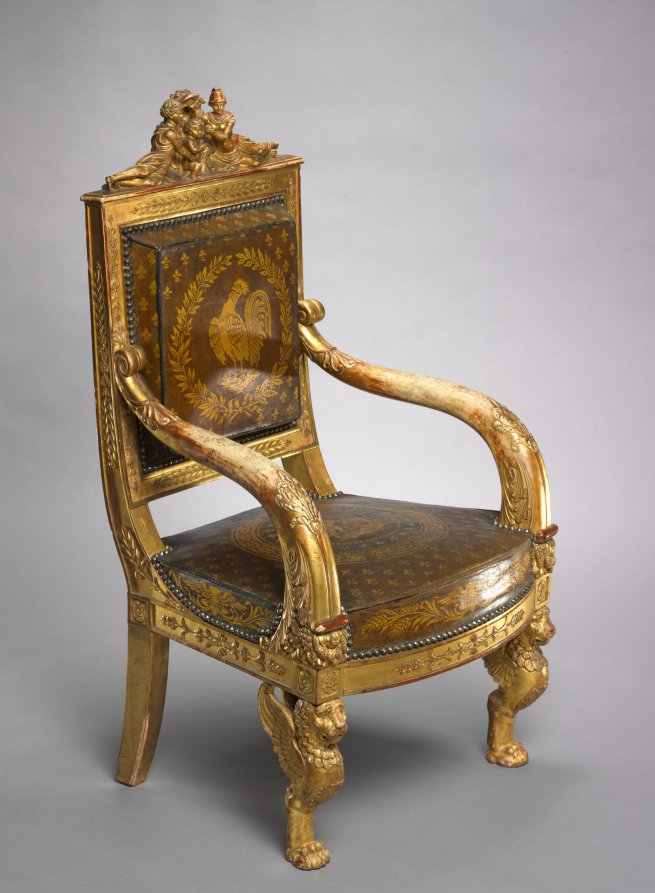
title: Child's Throne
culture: France, Paris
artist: Pierre-Marie Balny le Jeune (French, 1832)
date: 1822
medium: carved and gilded wood, leather upholstery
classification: Furniture and woodwork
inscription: inscribed with stencils inside back rail: BLONDEL TAPISSIER/RUE ST. ANTOINE N 72 1822 inscribed in ink lower edge back rail: 12 JANVIER 18[22?]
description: This chair was made for the young, presumed successor to the French throne who ruled briefly as Henri V in 1830, the last of the direct Bourbon line. He is depicted at the center of the top rail protected by female figures representing France and Minerva, the Roman goddess of wisdom. Fleurs-de-lis and the Gallic rooster, symbols of French royalty and the French people, decorate the upholstery.